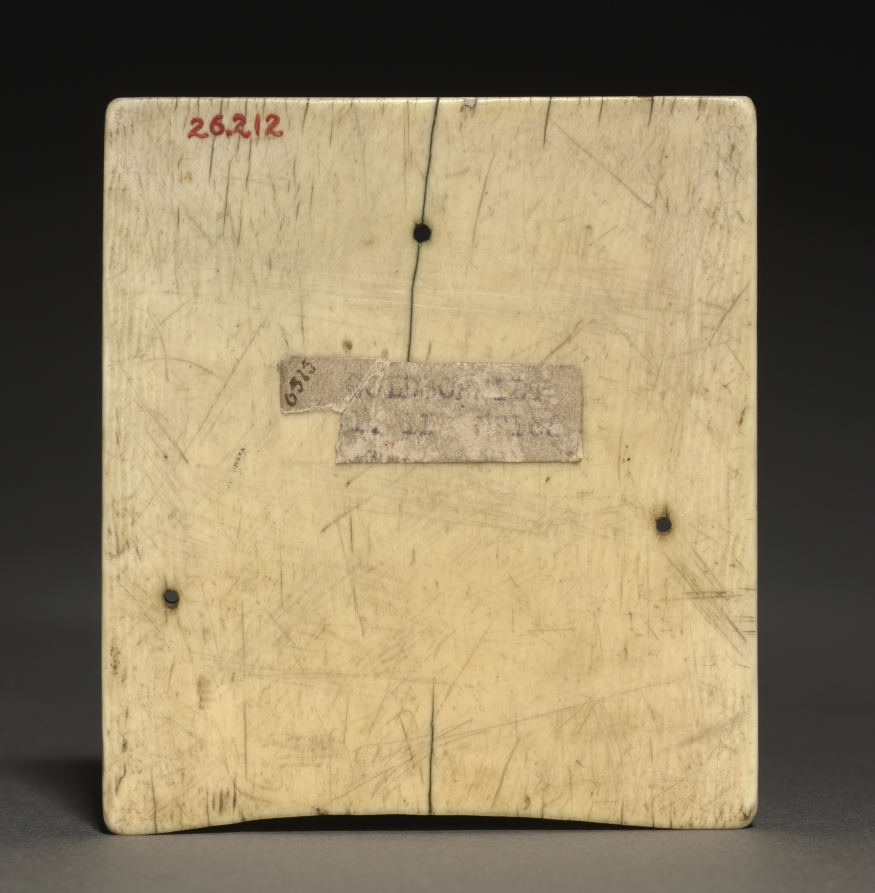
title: Plaque from a Portable Altar: Zacharias at the Altar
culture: Germany, Rhine Valley, Cologne?, Romanesque period, 12th century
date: c. 1100–1125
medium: ivory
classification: Ivory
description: This delicate ivory plaque may once have decorated a side of a portable altar. It likely depicts the angel of the Lord appearing to the priest Zacharias, the father of John the Baptist, at the altar in the temple. Like the identity of the object in Zacharias’s hands, the identity of the couple accompanying the priest remains unclear.